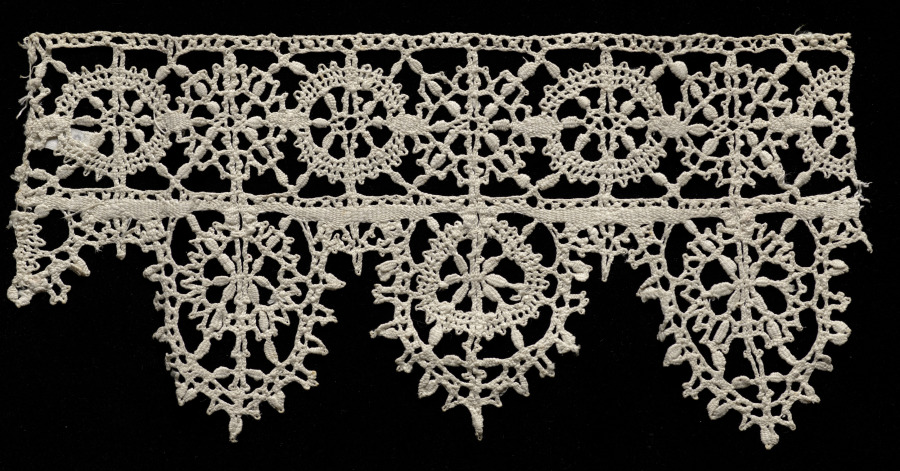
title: Lace Insertion and Edging of Points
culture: Italy, Genoa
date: 1600s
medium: Bobbin lace (rose lace)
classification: Lace